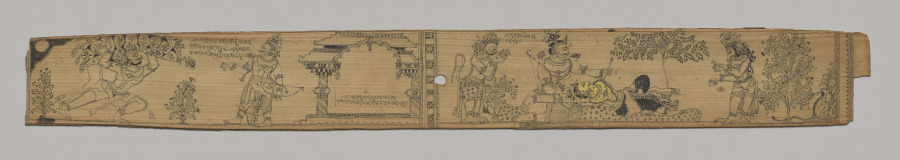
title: Hanuman Brings the Mountain of Healing Plants; Rama Extracts the Arrow from Lakshmana as Hanuman and a Bear Prepare to Treat Him (recto), from a Romance of Chandrabhanu and Lavanyavati of Upendra Bhanja (Indian, died 1740)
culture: Eastern India, Odisha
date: late 1700s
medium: gum tempera and charcoal on palm leaf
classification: Painting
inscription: on both recto and verso in Oriya